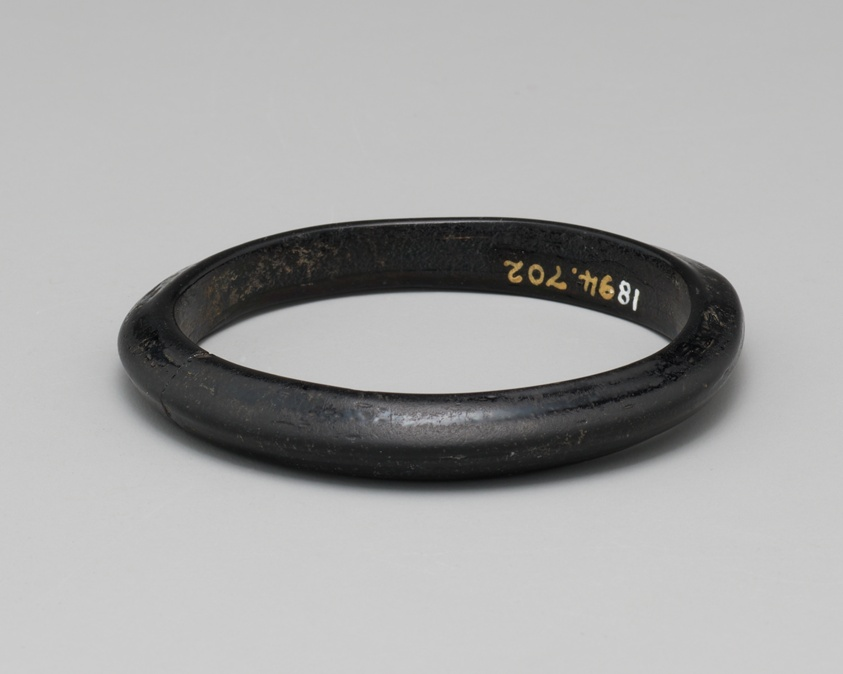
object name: Costume and Accessories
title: Bracelet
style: Islamic (culture or style)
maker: Islamic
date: 14th-15th century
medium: Glass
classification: glass; jewelry; ancient art; costume